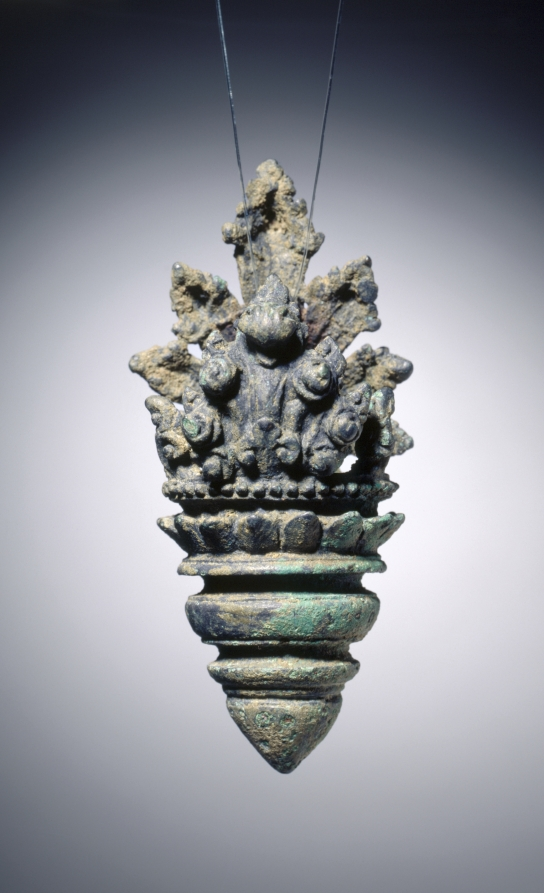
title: Earring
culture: Cambodia, Angkorean Period (877-1431)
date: c. 1100s–1200s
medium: bronze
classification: Jewelry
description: Earrings that were cast in bronze and then gilded (on this example, the gilding has worn off) were attached to the stone sculptures themselves. The serpent, a Khmer national emblem, was used frequently as an ornamental motif. The historical Buddha Shakyamuni was born a prince in northern India in the late 500s BC, and he wore heavy earrings that dragged down his earlobes. When he renounced worldly life to seek enlightenment, he cast off all his jewels. Generally, Buddha images have elongated earlobes without earrings, while bodhisattvas—beings close to full enlightenment—wear princely jewels in reference to Shakyamuni’s princely life just before he became a Buddha. By the early 1200s in Cambodia, however, these categories had become more nuanced: the bodhisattva Lokeshvara was viewed as such a potent figure he was sometimes called a Buddha and images of some special Buddhas other than Shakyamuni were distinguished by their jewelry.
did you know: This earring is topped with the form of a naga, a water serpent with a multi-headed hood.